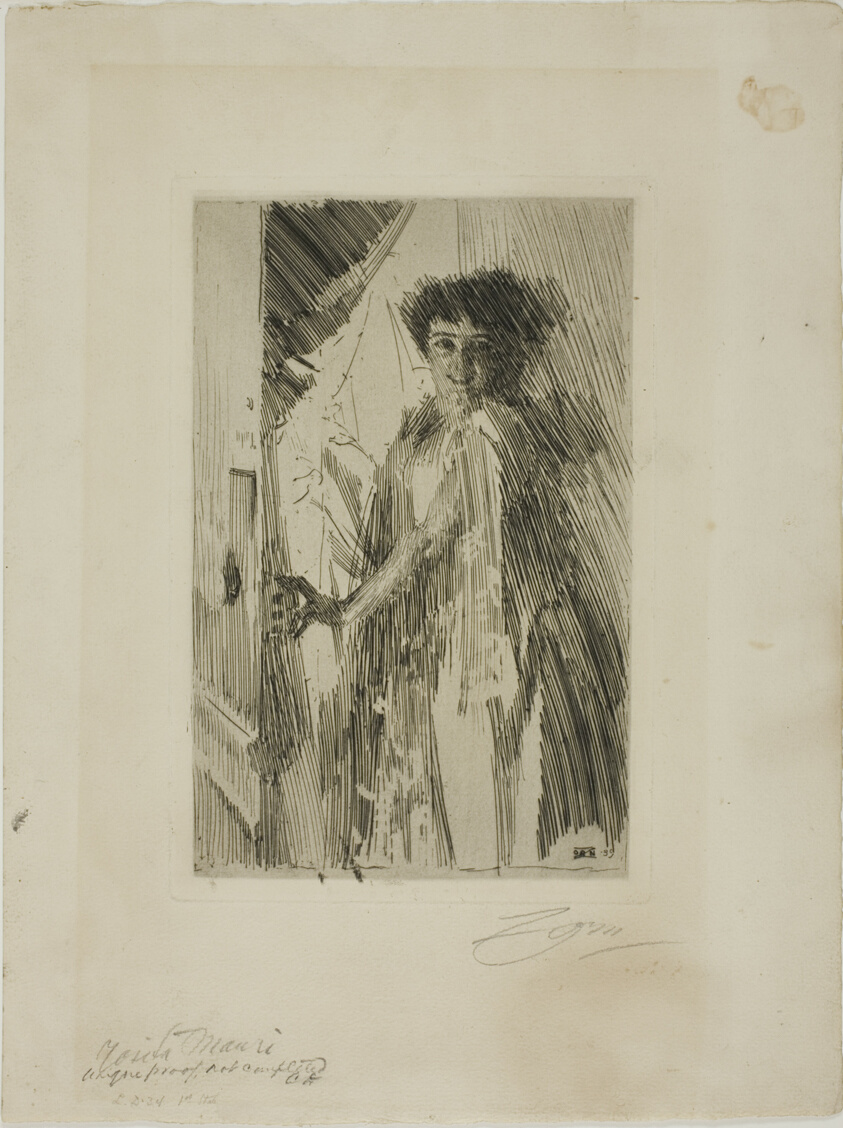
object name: Print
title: Rosita Mauri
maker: Anders Zorn (Swedish, 1860-1920)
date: 1889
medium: Etching on ivory laid paper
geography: Sweden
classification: etching; print; prints and drawing